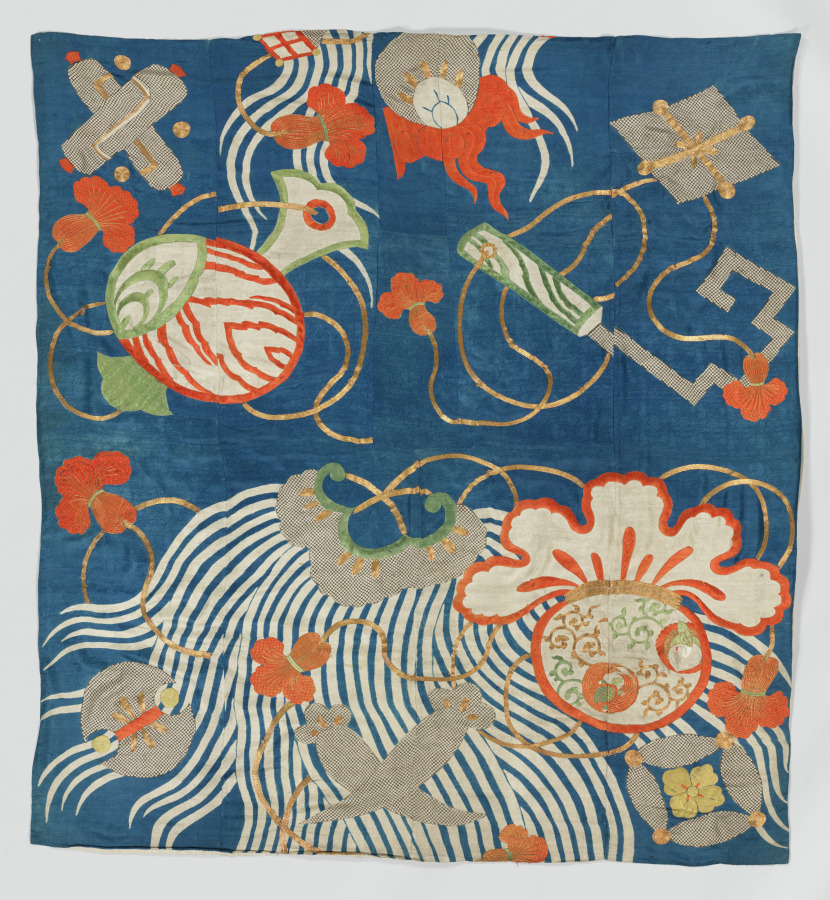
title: Embroidered Silk Square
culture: Japan, Genroku Style (1680-1720)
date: 1680–1720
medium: silk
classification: Embroidery